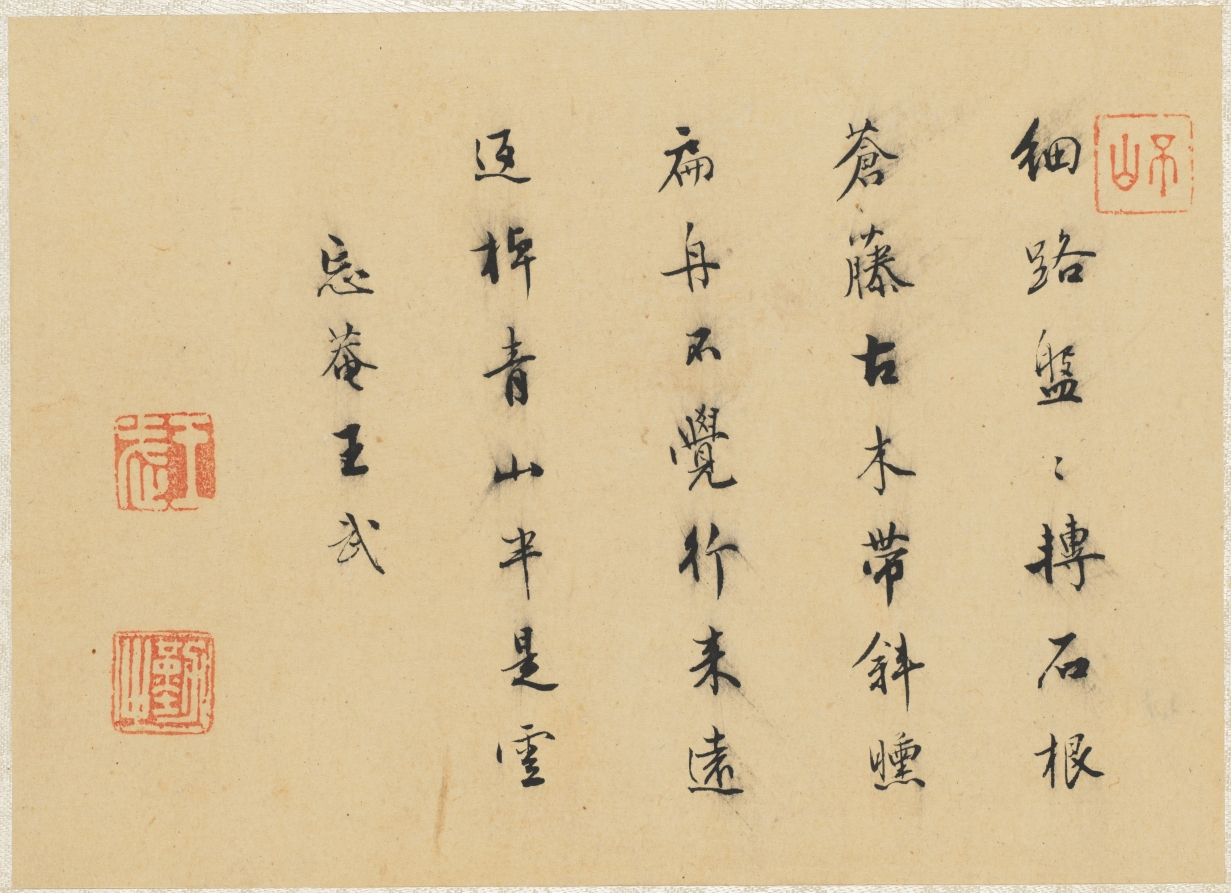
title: Album of Miscellaneous Subjects, Leaf 1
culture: China, Qing dynasty (1644-1911)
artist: Fan Qi (Chinese, 1616–after 1694)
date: early 1650s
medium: album cover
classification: Painting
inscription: Artist seal: Fan Qi 樊圻. Poem by Wang Wu 王武 (1632–1690): A narrow path coiling, winds across rock foundations;/ Old vines and ancient trees meet the sunset's slanting rays./ Unaware that my small boat has gone so far,/ By the time it reverses its oars, the green mountains will be half-covered with clouds.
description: Fan Qi's painting on leaf one may be inspired by Tang dynasty poet's Li Bai's line: A small boat has sailed through ten thousand layers of hills. Wang Wu's colophon facing the painting reads: A narrow path coiling, winds across rock foundations; Old vines and ancient trees meet the sunset's slanting rays. Unaware that my small boat has gone so far, By the time it reverses its oars, the green mountains will be half-covered with clouds.